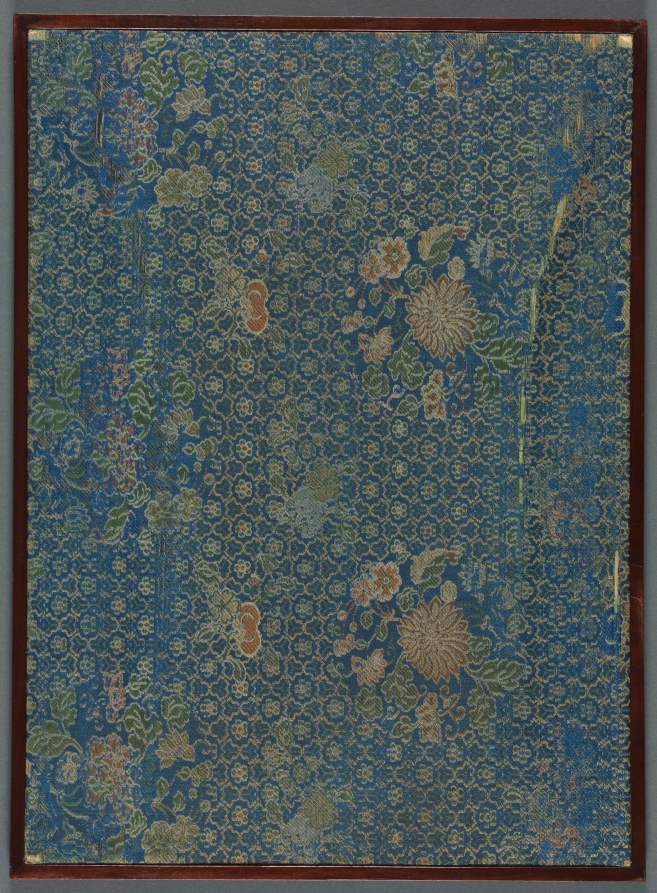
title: Reminiscences of Qinhuai River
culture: China, Qing dynasty (1644-1911)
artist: Shitao (Chinese, 1642–1707)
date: 1642–1707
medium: Album of eight leaves, ink and color on Song paper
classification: Painting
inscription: 大滌尊者濟 [印]原濟; 石濤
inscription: 沿溪四十九迴折，搜盡秦淮六代奇。/ 雪霽東山誰着屐，風高西壑自成詩。/ 應憐孤冷長無伴，其剩槎牙只幾枝。/ 滿地落花春未了，酸心如豆耐人思。/ 仲賓先生以宋紙十幅寄余真州命畫。因憶昔時秦淮探梅聚首之地，寫此就教。清湘石濤濟道人。[印]原濟; 石濤.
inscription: 2 colophons and 15 additional seals: 1 colophon, dated 1937, and 1 seal of Wu Huayuan 吳華源 (1893–1972); 1 colophon, dated 1938, and 2 seals of Wu Hufan 吳湖帆 (1894–1968); 1 seal of C. C. Wang 王季遷 (1907–2003); 11 seals unidentified.